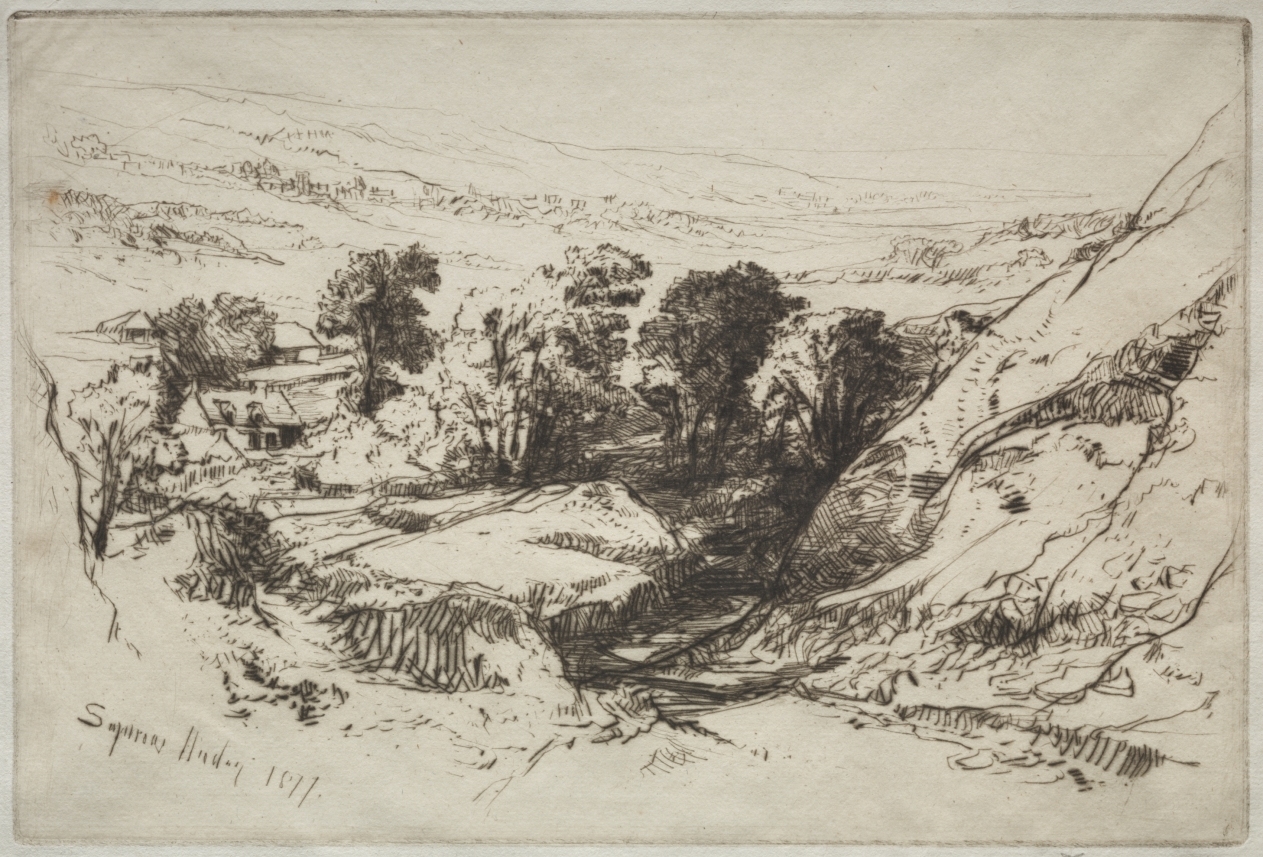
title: Nine Barrow Down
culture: England, 19th century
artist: Francis Seymour Haden (British, 1818–1910)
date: 1877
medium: drypoint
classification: Print